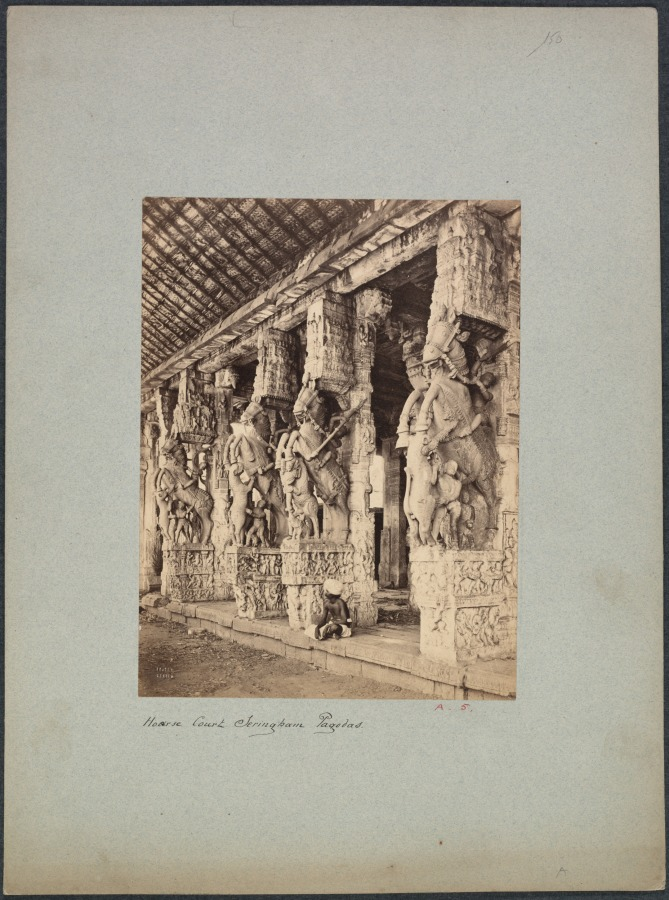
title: Trichinopoly Horse Court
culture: England, 19th century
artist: Francis Frith & Co. (British)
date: 1850s-1870s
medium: Albumen print from wet collodion negative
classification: Photograph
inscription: Albumen print from wet collodion negative Imprinted in bottom left corner of the image: "FRITH'S/SERIES" Written in red marker on recto of mount: "A.5" Written in brown ink on recto of mount: "Hoarse Court Seringham Pagodas" Written in pencil on recto of mount: "150" Written in pencil on verso of mount: "Ensembled 8 77 rajes 1000 (?)"